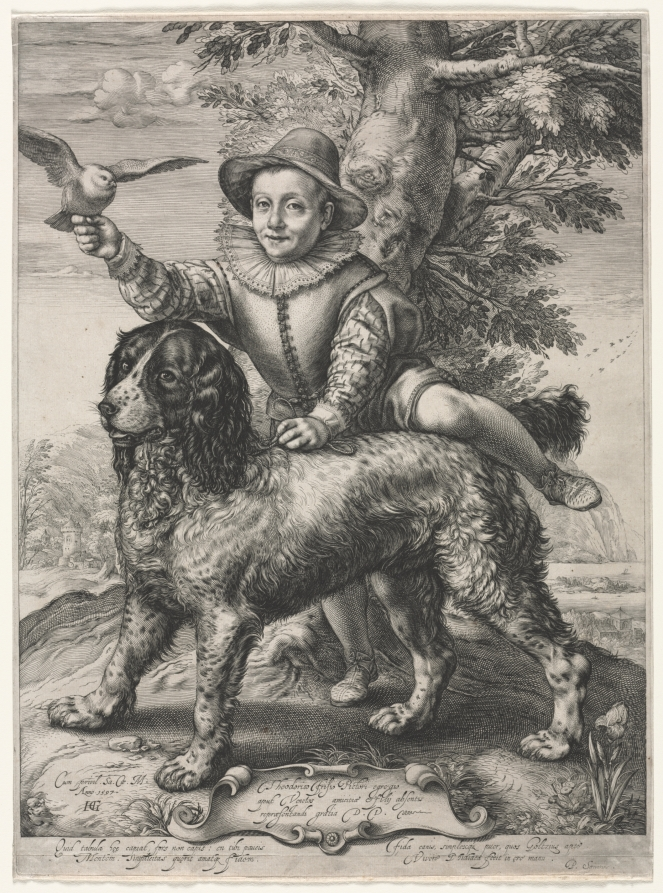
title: Portrait of Frederick de Vries and His Dog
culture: Netherlands, 16th century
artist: Hendrick Goltzius (Dutch, 1558–1617)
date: 1597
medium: engraving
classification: Print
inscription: lower center, in plate (in cartouche): Theodorico Frisio Pictori egregio / aput Venetos amicitiæ' et filii absentis / repræsentandi gratia D.D. [do dedicoque] ; lower left, in plate: Cum privil. Sa. Cæ. M. / Anno·1597. / HG [in monogram] ; across bottom, in plate: Quid tabula hæc capiat, fors non capis: en tibi paucis / Mentem. Simplicitas quaerit amatque fidem. / Fida canis, simplexque puer, quos Goltzius apto' / Vivero Phidiacâ fecit in ære' manu. P. Scriverius. ; VERSO, lower left, in brown ink: h: Dreux 1854. ; lower right, in brown ink: [l?]cn. [?d]cn. 1864 Nº78 ; lower left, in graphite: Superb épreuve- ; lower left, in graphite: C8469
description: The inscription in the center states: "I dedicate [this work] to the excellent painter Dirck de Vries in Venice out of friendship and to represent his absent son." The inscription in the bottom margin, written by the Dutch scholar Petrus Scriverius (or Peter Schrijver, 1576–1660), reads: "You may not understand what is contained in this work: Here is the meaning for you in a few words. Simplicity seeks and loves faithfulness. The faithful dog and the innocent boy, that Goltzius faithfully rendered with a Phidian hand in copper." Goltzius made this print for his friend the painter Dirck de Vries (Netherlandish, active 1590–1609) to let him know how his son was progressing under Goltzius’s care in the Dutch city of Haarlem. The two artists had met in Venice, where de Vries still lived. Phidias, referred to in the inscription, was an ancient Greek sculptor whose works were celebrated for their classical forms and their expressions of noble and moral character.